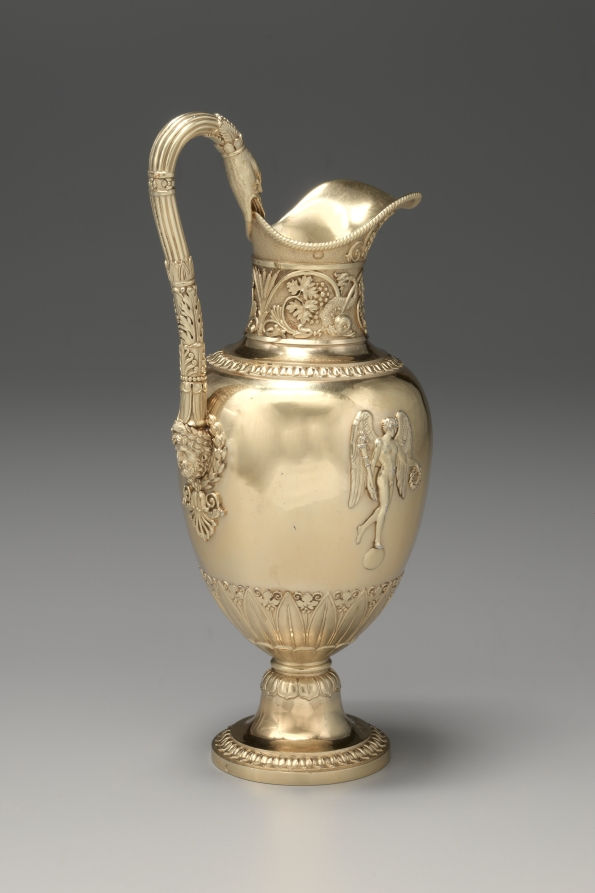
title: Ewer (aiguière)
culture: France, 19th century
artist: Jean Baptiste Claude Odiot (French)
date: c. 1817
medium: silver gilt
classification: Silver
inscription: [Excise mark for medium-sized work, Paris, 1809-1819, on edge of base]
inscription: [Two maker's marks of Jean-Baptiste-Claude Odiot after the Revolution, inside foot]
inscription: [Official assay mark for first standard silver, Paris, 1809-1819, near exterior upper rim]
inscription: [Applied coat of arms of the count Alfred de la Chapelle, Seigneur of Morton and Beaulieu, Périgord “accolé” with an alternate version of de la Chapelle, exterior of foot]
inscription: [Struck twice, interior foot]: "ODIOT"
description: Jean-Baptiste-Claude Odiot’s reputation stretched internationally. Commissioned by Russian count Nikolei Demidoff, this ewer was one part of an extensive silver dinner service. Decorated with motifs of classical antiquity, this object’s Greco-Roman silhouette, grape vine frieze, raised mythological figures, and sinuous swan’s neck handle were likely inspired by the designs of Charles Percier and Pierre-François Fontaine, architects of Napoleon I.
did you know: The coat of arms on the foot of this ewer belongs to the count Alfred de la Chapelle who owned this silver dinner service during the second half of the 19th century.